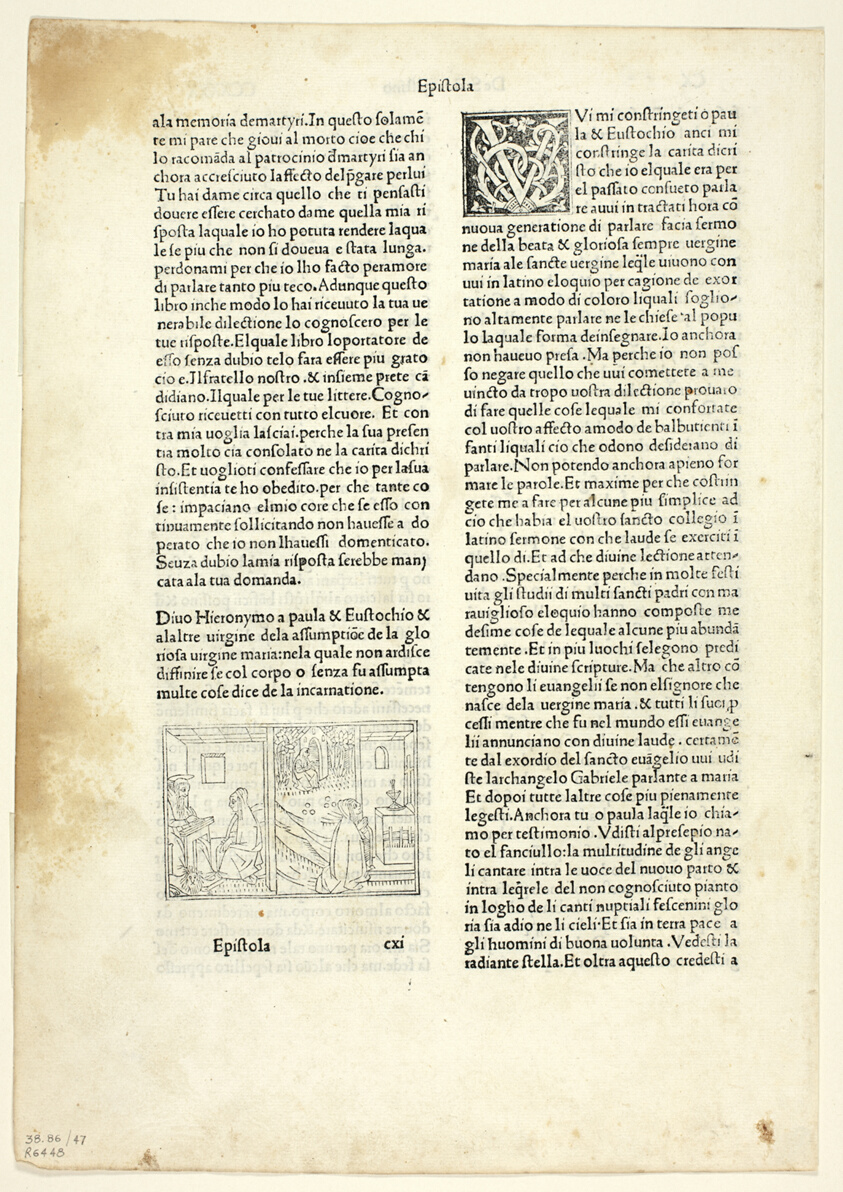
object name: Print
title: Epistle CXI to Paula and Eustochio from Epistolae (Letters of Saint Jerome), Plate 47 from Woodcuts from Books of the 15th Century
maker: Unknown Artist (Ferrara, late 15th century); printed and published by Lorenzo de Rossi (Italian, active 1482-1522); original text by Saint Jerome (Dalmatia, c. 347–420); portfolio text by Wilhelm Ludwig Schreiber (German, 1855–1932)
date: 1497, portfolio assembled 1929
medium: Woodcut in black, and letterpress in black (recto and verso), on cream laid paper, tipped onto cream wove paper mat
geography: Italy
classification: woodcut; print; prints and drawing